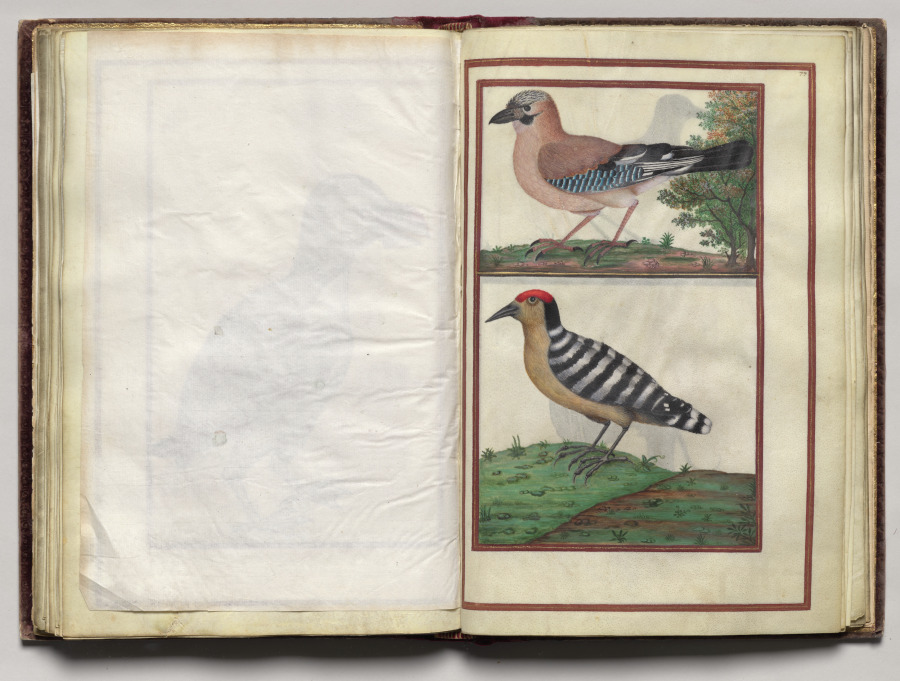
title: Woodpeckers, folio 37 (recto), from Florilegium (A Book of Flower Studies)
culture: France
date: 1608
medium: watercolor, ink, silver, and gold over occasional traces of pencil, on vellum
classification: Bound Volume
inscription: Dated: Poitiers 1608 (on frontispiece) Signed: On frontispiece in black ink, lower right: Van Kuyk Notation on drawing: Frontispiece: in pencil, lower margin: * élève de Van Kessel, peintre flammand (* in pencil also appears in front of Van Kuyk's name).